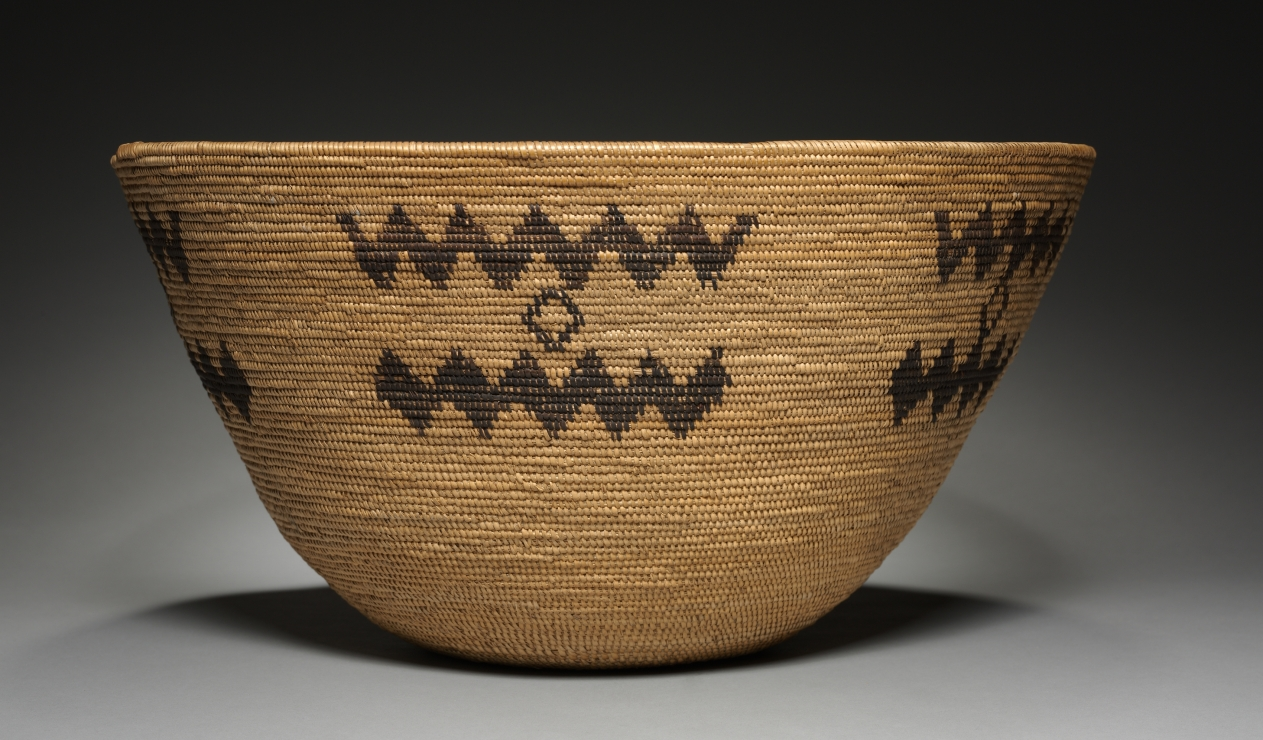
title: Food or Carrying Bowl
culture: California, Pala Band Luiseño, Pala Mission, late 19th - early 20th century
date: late 1800–early 1900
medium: coiled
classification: Basketry